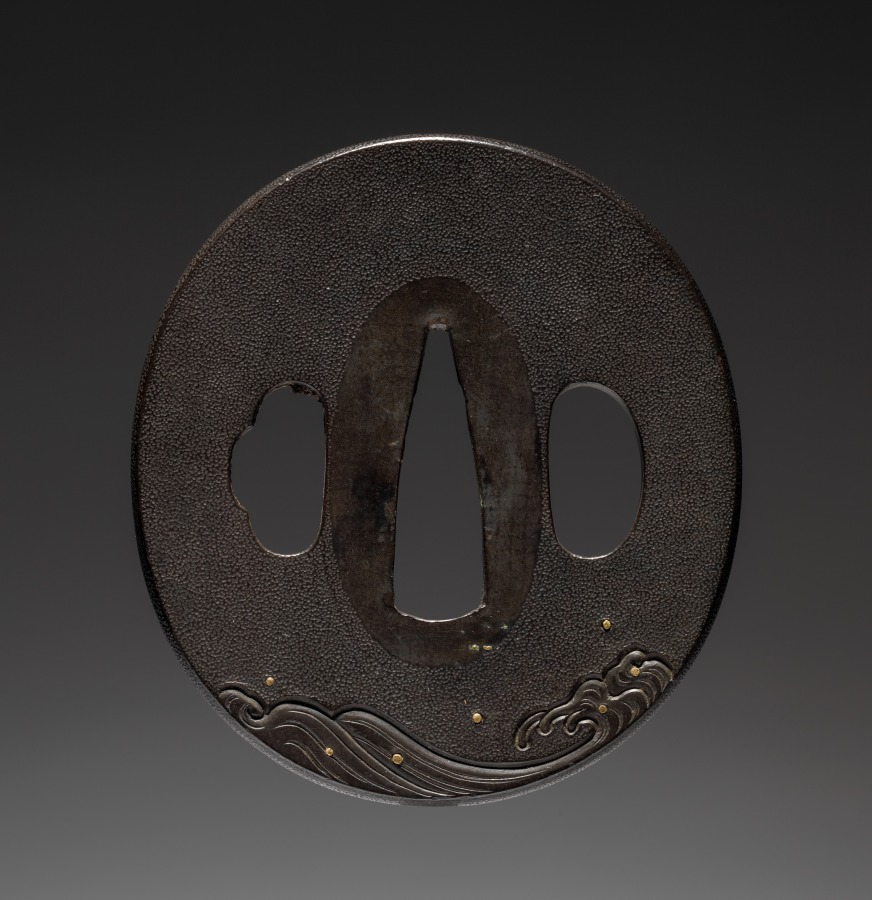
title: Sword Guard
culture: Japan, Edo period (1615–1868)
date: 1615–1868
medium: metal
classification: Arms and Armor